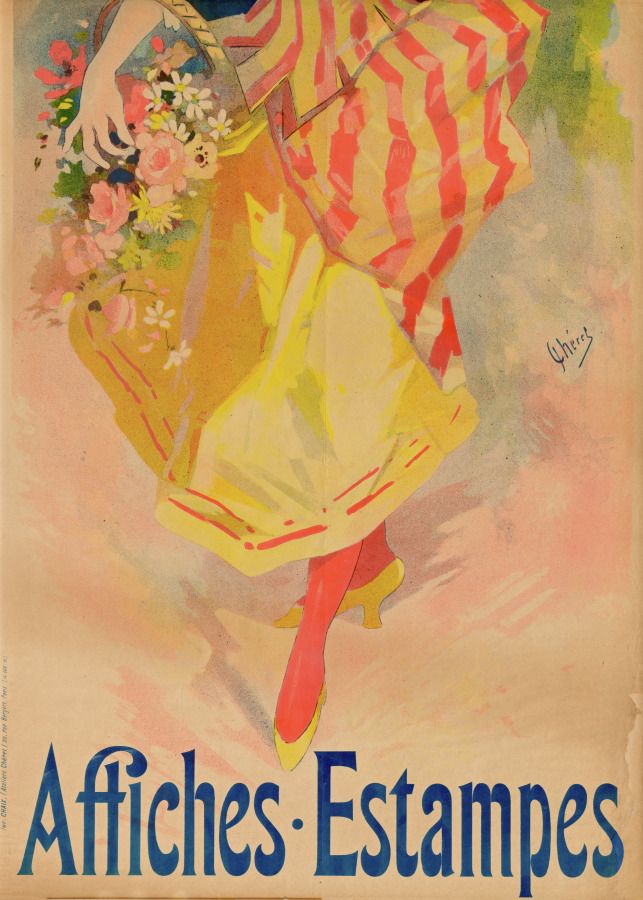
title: Bookstore Ed. Sagot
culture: France, Paris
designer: Jules Chéret (French, 1836–1932)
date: 1891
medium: color lithograph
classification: Print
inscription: on back of upper sheet, in pencil: Cheret - Ed. Sagot